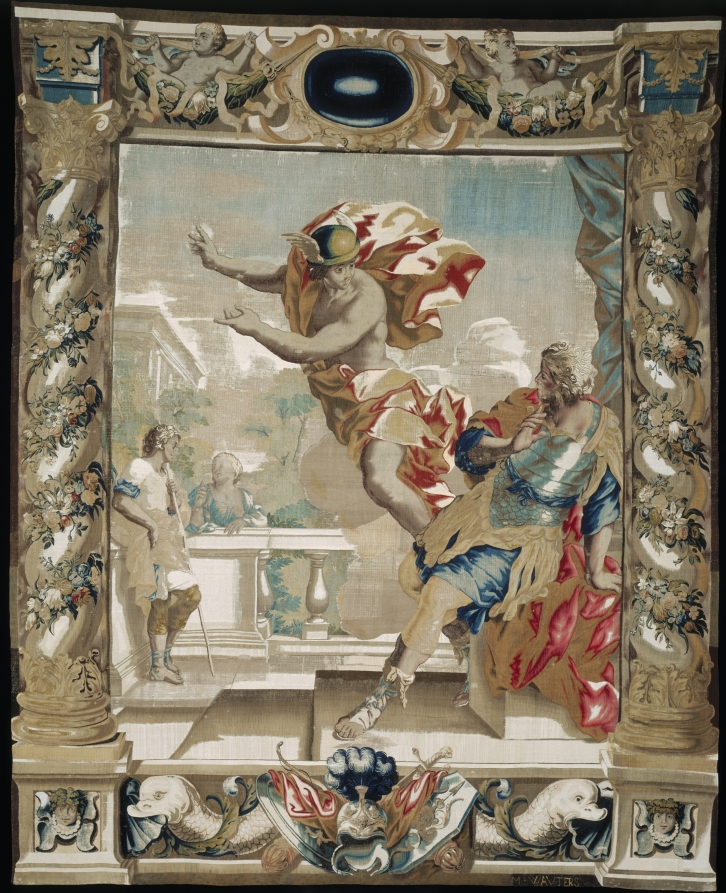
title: Mercury tells Aeneas to Leave Carthage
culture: Belgium, 17th century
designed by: Giovanni Francesco Romanelli (Italian, 1610–1662)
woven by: Michael Wauters (Flemish, 1679)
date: 1679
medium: tapestry weave: silk and wool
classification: Tapestry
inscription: signed lower right: M. Wavters.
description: The supreme god, Jupiter, sends his messenger Mercury to the Trojan hero Aeneas to urge him to continue his voyage and leave Carthage in order to fulfil his destiny, to found Rome.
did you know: This tapestry is one from a series of eight that depicts the tragic love story of Dido and Aeneas. They were gifted to the museum for display in the armor court.